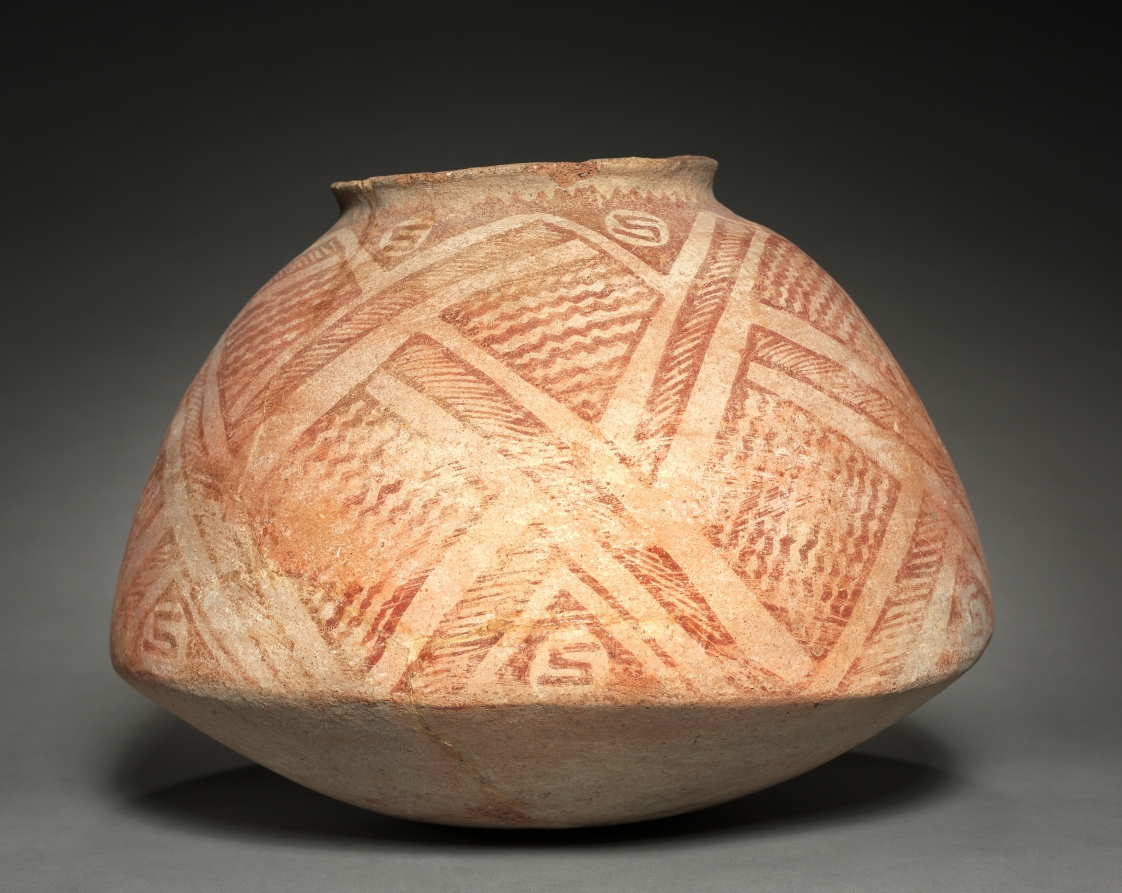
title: Large Storage Jar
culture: Southwest, Arizona, Hohokam, 10th-11th century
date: c. 900–1100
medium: Ceramic, slip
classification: Ceramic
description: The Hohokam Arizona were accomplished agriculturalists whose decline after 1350 was caused partially by drought, and then flooding that overcame irrigation canals. Many Hohokam settlements boasted large public structures including platform mounds and oval ballcourts. The latter reveal contact with Mexico, where the ballgame was a long-established tradition.